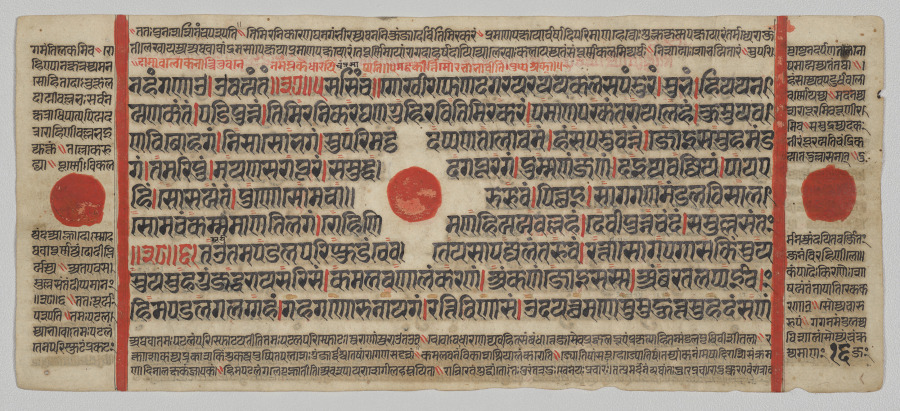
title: Text, Folio 16 (verso), from a Kalpa-sutra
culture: Western India, Gujarat, last quarter of the 15th century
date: c. 1475–1500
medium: Gum tempera, ink, and gold on paper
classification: Painting